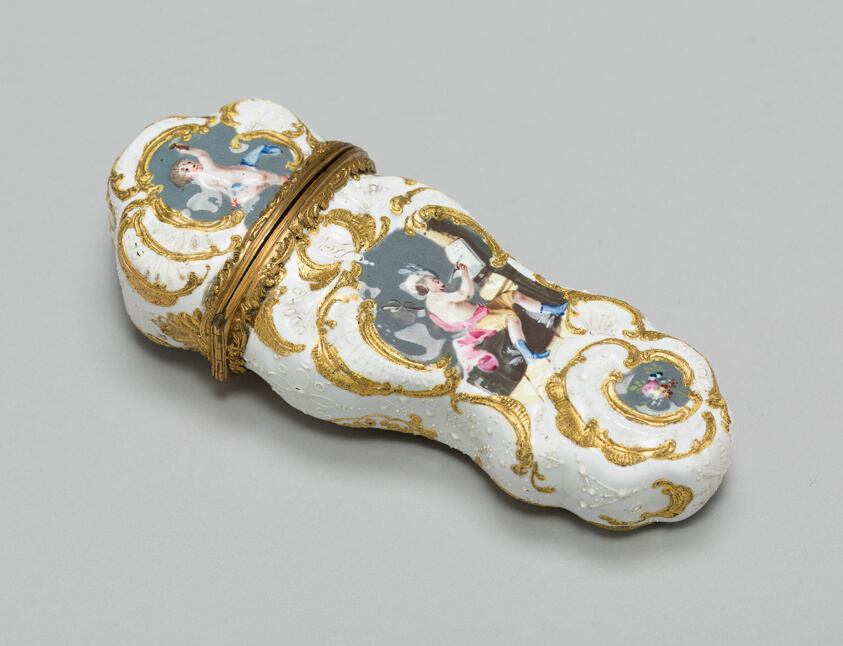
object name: Metalwork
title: Nécessaire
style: Rococo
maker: South Staffordshire, England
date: c. 1770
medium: Polychrome enamel and gilding on copper with gilt metal mounts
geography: England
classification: enamel; metalwork